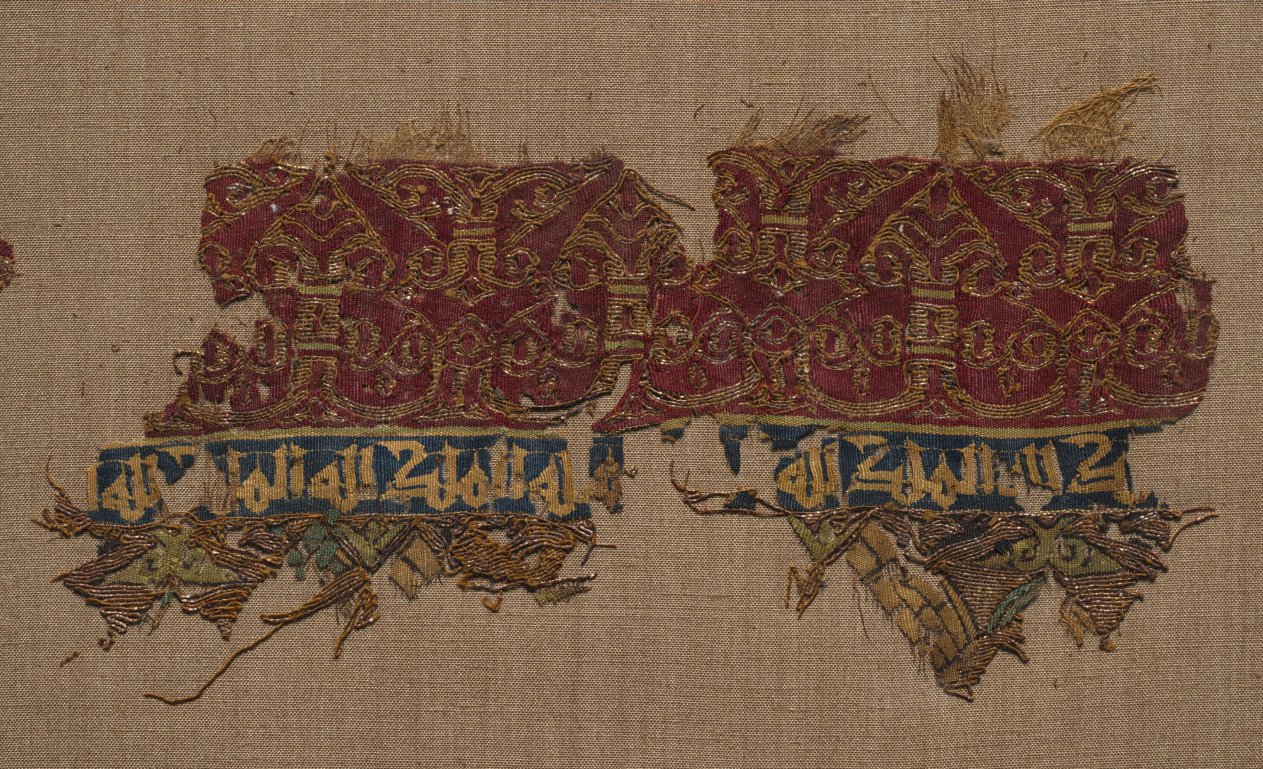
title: Tiraz with gold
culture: Egypt, Fatimid period, reign of Caliph al-Hakim, 1013–1020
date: 1013–1020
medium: plain weave with inwoven tapestry weave: linen, silk, and gold filé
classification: Textile